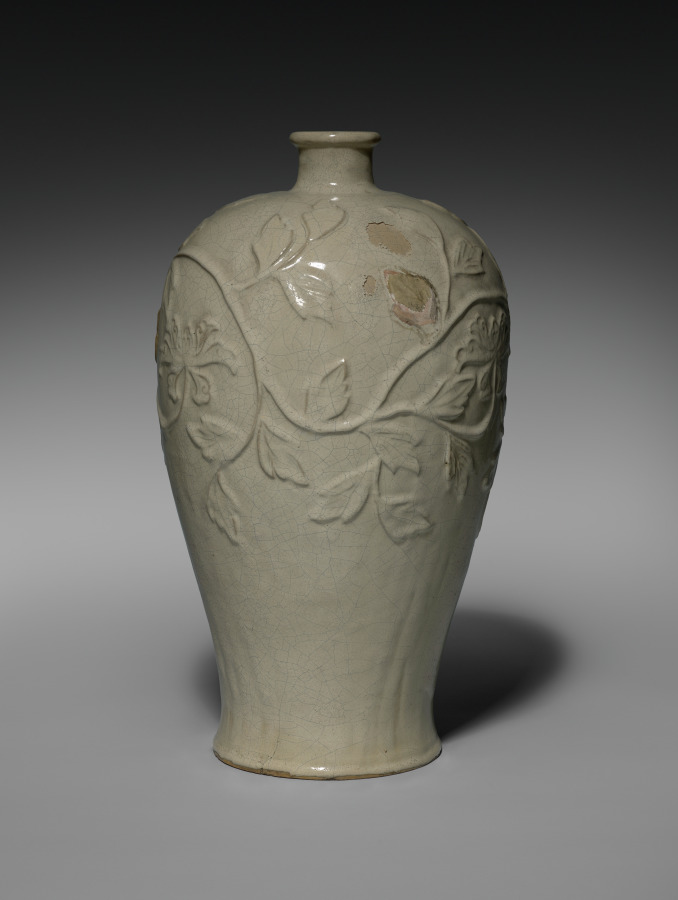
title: Jar: Kuang Tung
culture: China, Qing dynasty (1644-1911)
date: 1644–1911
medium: porcelain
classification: Ceramic